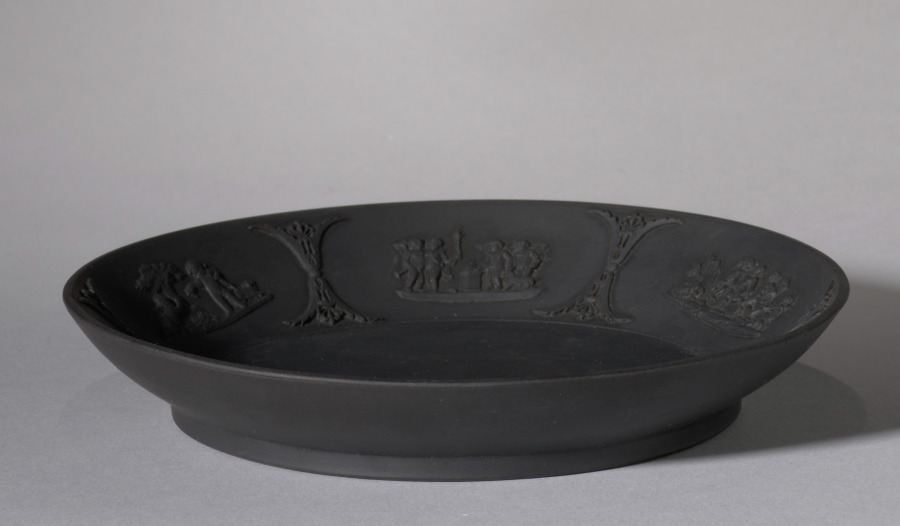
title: Saucer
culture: England, Staffordshire, 19th century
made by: Wedgwood Factory (British)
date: 1800s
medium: black basalt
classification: Ceramic